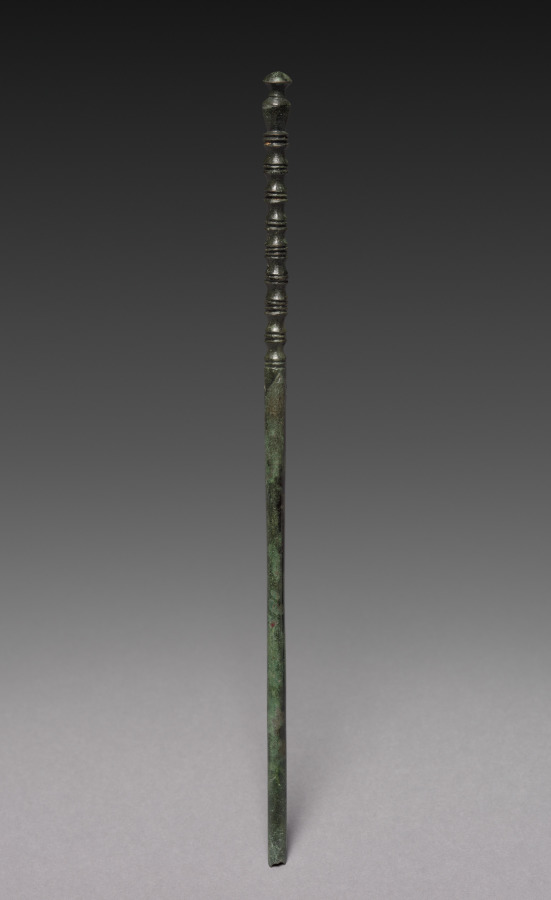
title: Chopstick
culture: Korea, Goryeo dynasty (918–1392)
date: 1000s-1100s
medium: bronze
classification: Implements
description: In Korea, chopsticks made of metal such as brass, silver, and gold were excavated from ancient tombs and ruins dated to the 6th century at the earliest. Burial goods often include utilitarian objects such as table wares and utensils because the dead were believed to need them in the afterlife.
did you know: In contrast to the Chinese and Japanese, Koreans still prefer metal chopsticks (stainless steel and brass) to wooden ones.